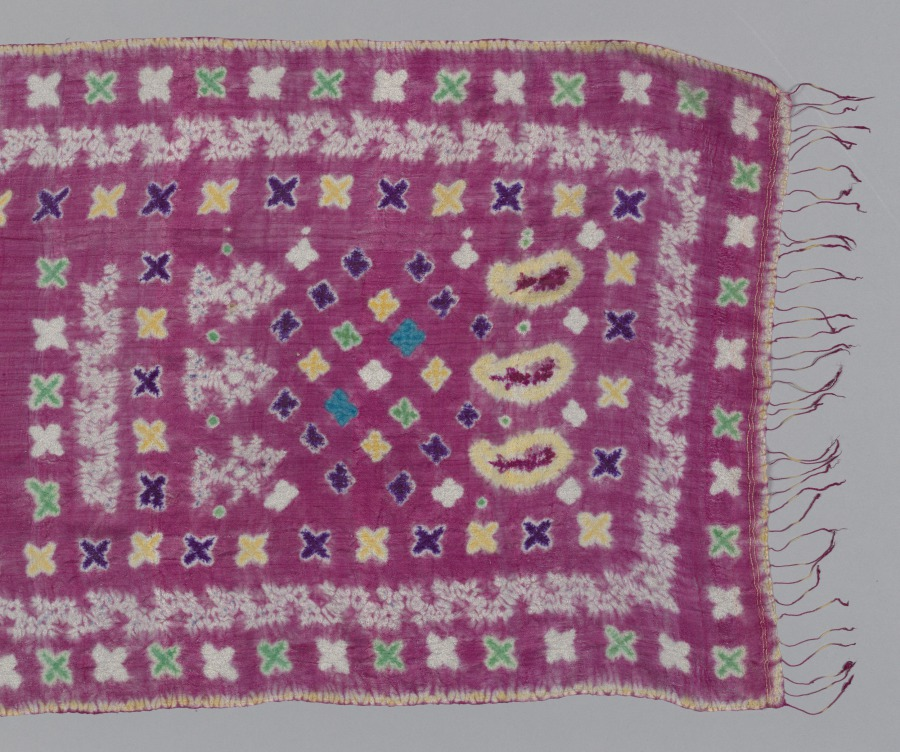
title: Silk Veil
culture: India, 19th - 20th century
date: 1800s - early 1900s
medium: tritik (stitch resist); silk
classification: Textile